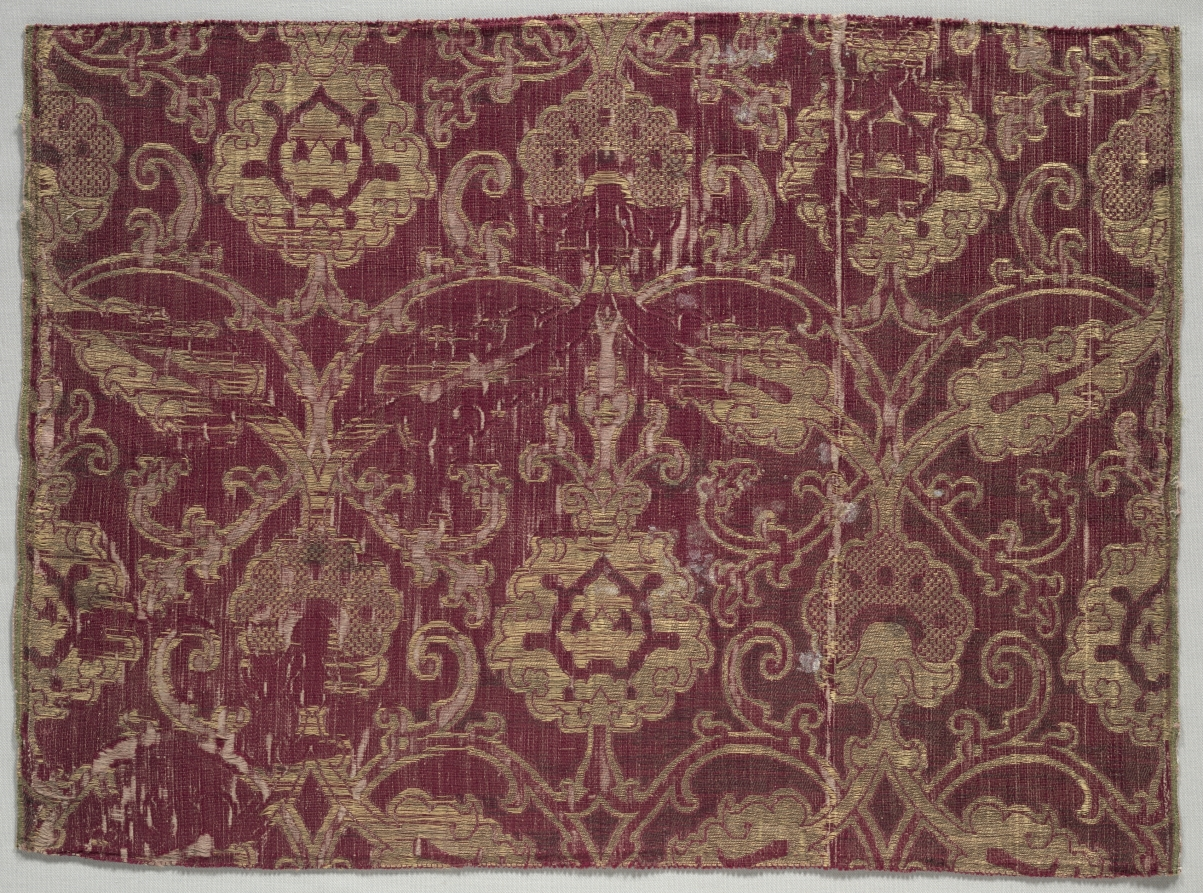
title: Length of Textile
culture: Italy or Spain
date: 1500s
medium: silk, linen, and metal: brocade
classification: Textile